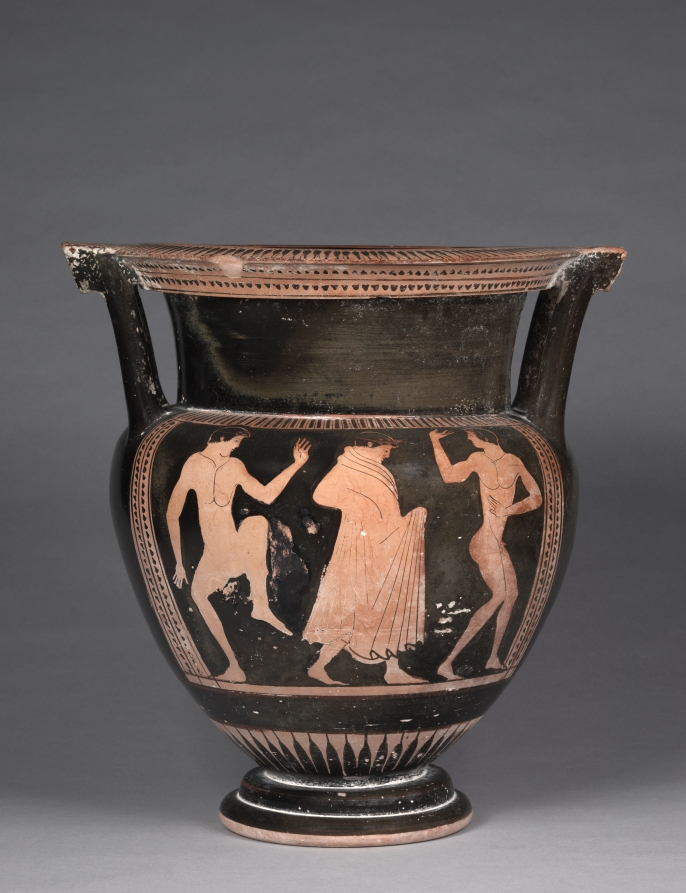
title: Red-Figure Column Krater (Mixing Vessel): Komos (Revel)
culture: Greek, Attic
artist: attributed to Pig Painter (Greek, Attic, active c. 480–460 BCE)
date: c. 470–460 BCE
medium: ceramic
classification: Ceramic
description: Used for mixing wine and water at a symposium (drinking party), this vase bears images of komasts, or revelers, potentially mirroring the actions of its users. The three bearded men on side A stand out for their earrings, long drapery, and Eastern-style headdresses, and for the parasol held by one. Similar features have been noticed on numerous other red-figure vases, now called “Anakreontic” by scholars. This name refers to Anakreon, a 6th-century BC lyric poet from East Greece sometimes credited with inventing the barbitos, the long-stringed lyre played by the central figure on side A. The youths on side B, one draped, two nude and dancing, are less unusual.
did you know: These three bearded men wear earrings and Eastern-style headdresses—unusual features in fifth-century BC Athens.